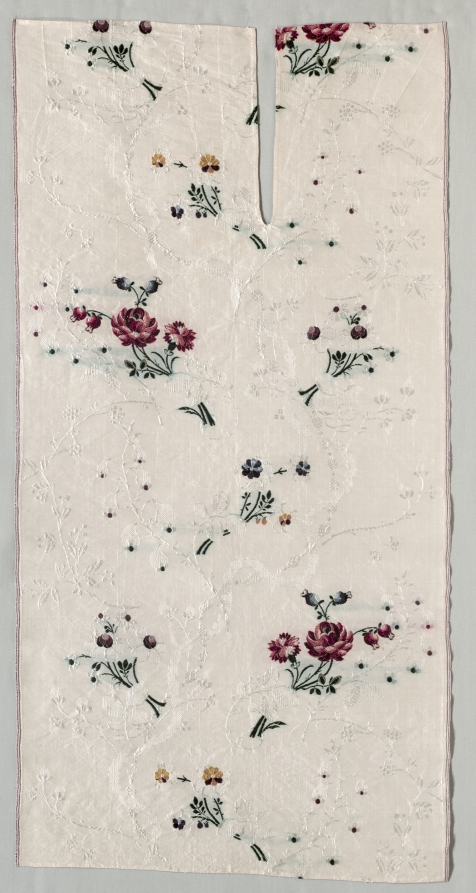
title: Length of Silk Brocade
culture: England, Spitalfields, 18th century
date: 1756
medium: silk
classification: Textile